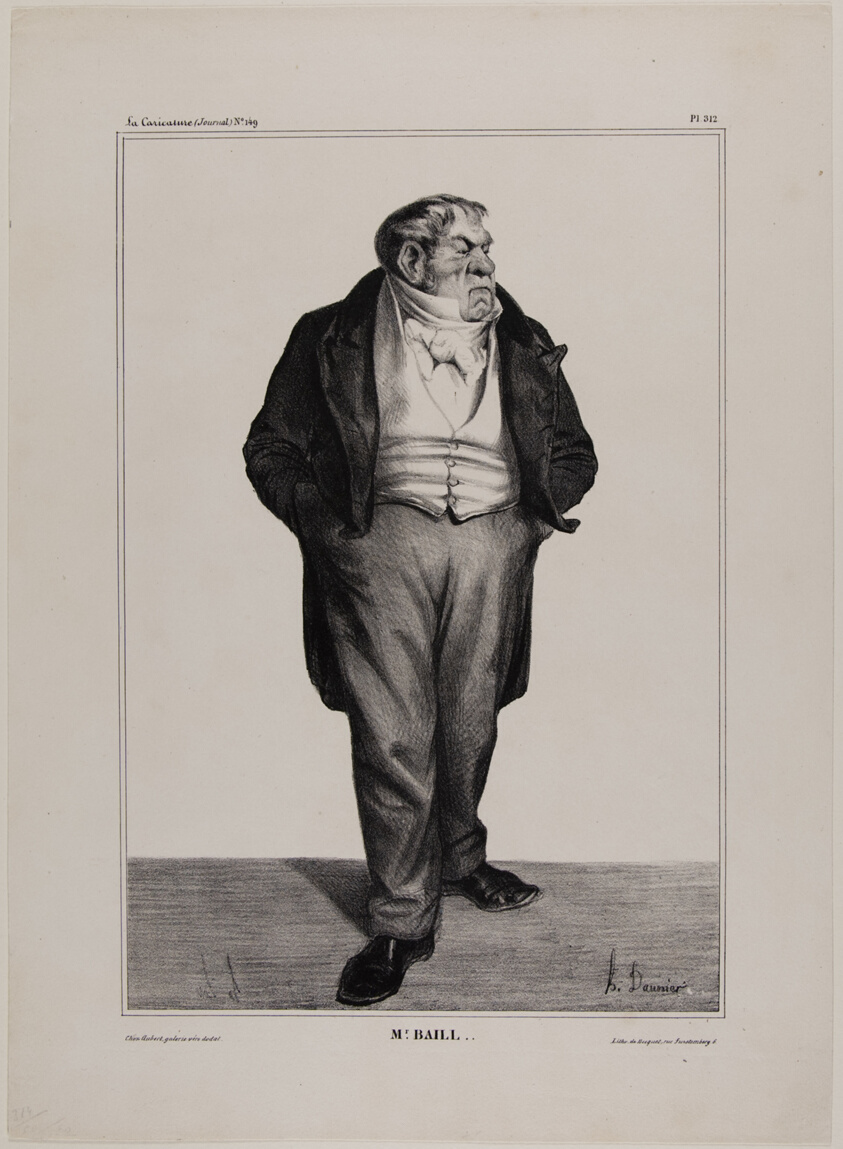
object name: Print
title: Mr. Baill.., plate 312 from Célébrités de la Caricature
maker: Honoré Victorin Daumier; French, 1808-1879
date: 1833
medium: Lithograph in black on ivory wove paper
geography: France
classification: lithograph; print; prints and drawing